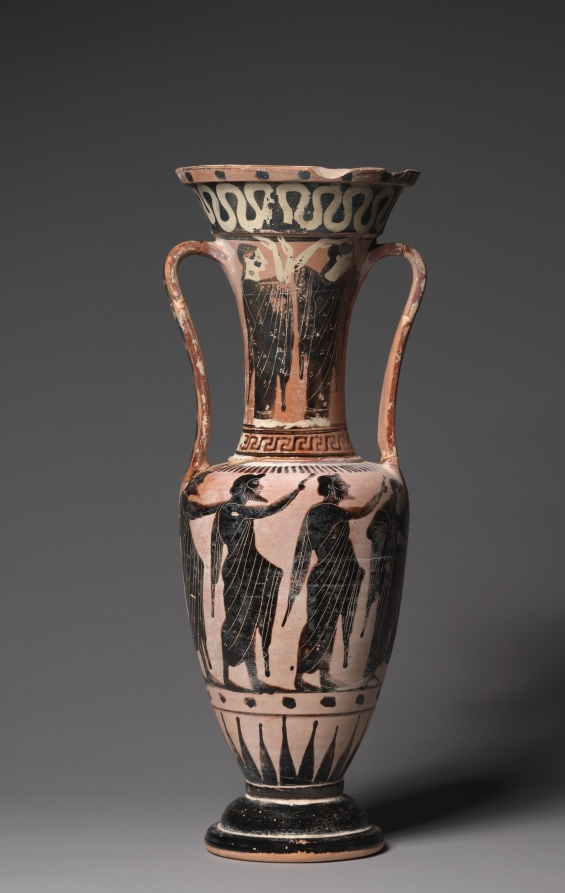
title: Black-Figure Loutrophoros-Amphora (Ritual Water Vessel): Prothesis (Laying out of Corpse), Mourners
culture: Greek, Attic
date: c. 500 BCE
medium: ceramic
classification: Ceramic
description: The loutrophoros, a tall-necked water vessel, served two main purposes in ancient Athens. In life, it carried sacred spring water for ceremonial pre-marriage baths. After death, it marked the tomb of an unmarried person, as if to account for that not experienced in life. Often, as here, it has no bottom, permitting offerings to flow through to the grave. Both the precise shape of this vase—a two-handled loutrophoros-amphora rather than a three-handled loutrophoros-hydria—and its depiction of the deceased suggest the commemoration of a departed man (rather than a woman). The iconography is entirely funerary, with multiple mourning figures shown: four women on the neck; six women surrounding the corpse on its bier; and three men making farewell gestures. The inscriptions near some of the mourning women do not spell out real words but may represent their sorrowful cries.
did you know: Mourning figures wrap all the way around this vessel, even beneath the handles.